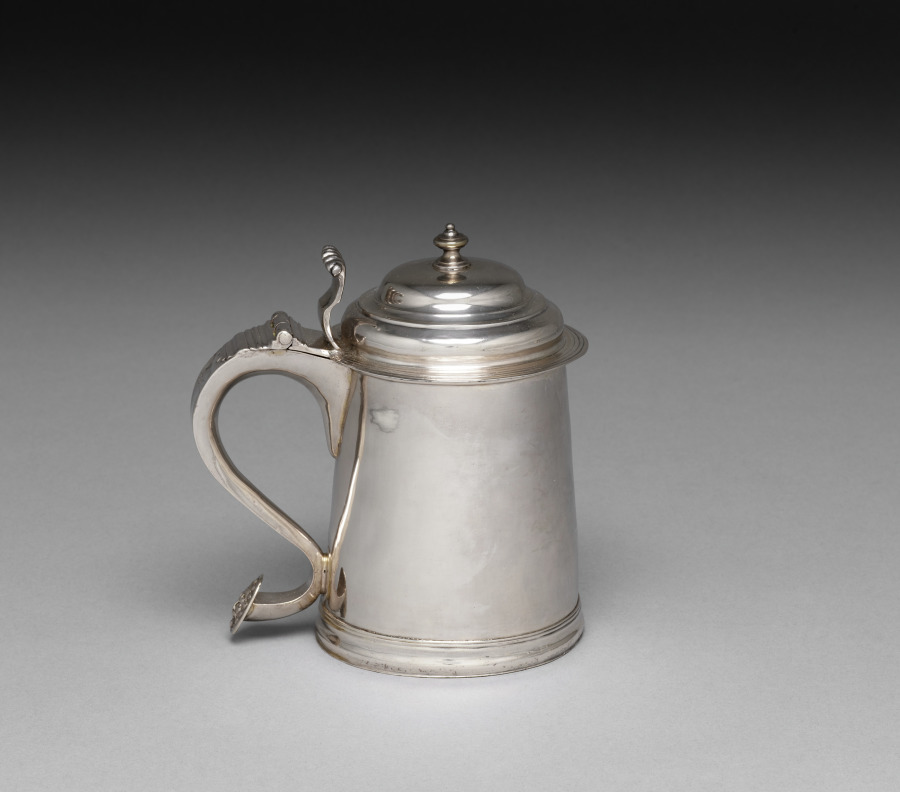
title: Tankard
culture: America, Massachusetts, Boston, early 18th century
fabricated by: John Edwards (British)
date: 1715–1720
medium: silver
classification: Silver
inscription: Engraved on handle: "SB to RA".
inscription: Stamped on side: "IE".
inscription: Engraved underside: "B" above "S.C".